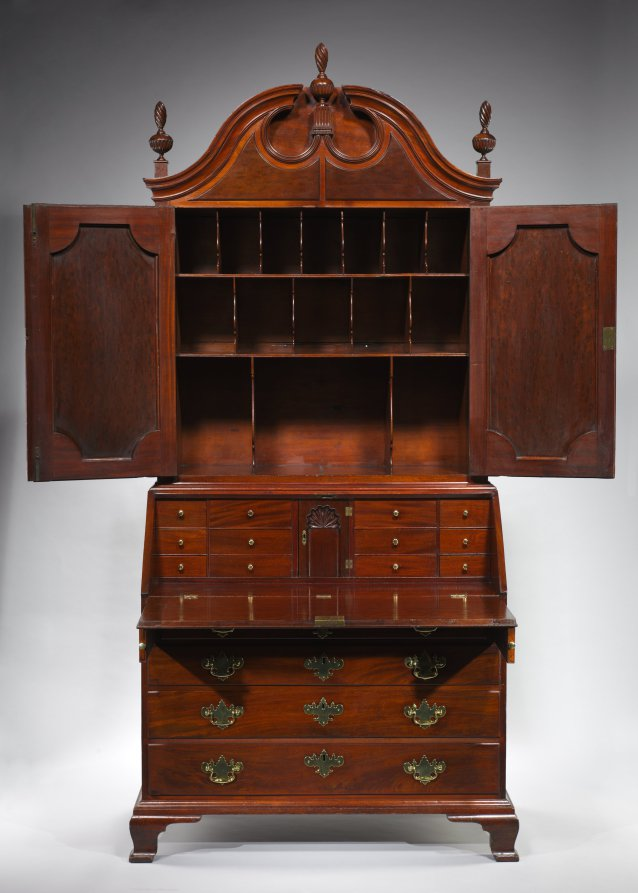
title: Desk and Bookcase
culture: America, Rhode Island, Newport, 18th century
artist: attributed to John Townsend (American, 1732–1809)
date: c. 1780–95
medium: "Plum pudding" mahogany, red cedar, chestnut, white pine, brass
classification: Furniture and woodwork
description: In the 1700s, Newport, Rhode Island, was the fifth largest city in North America and one of the most important centers of shipping and trade along the Eastern Seaboard. Orders for furniture from its celebrated cabinetmakers came in from far and wide. This desk and bookcase was likely made for Oliver Wolcott Sr., a signer of the Declaration of Independence and later governor of the State of Connecticut. Eventually, the desk passed down through his family to Dorothy Draper, an important 20th-century interior decorator, and ultimately to her daughter, Penelope Draper Buchanan, whose husband gave it to the museum after her death—a rare, unbroken line of succession. Large desks were designed to hold all the necessary components of a gentleman’s office under lock and key: books, papers, pens and ink, and important documents. To serve such a function desks also became complicated masterworks of the cabinetmaker’s art, incorporating many parts from small drawers to large panels cut from a single tree, making them among the most expensive types of furniture available. This desk and bookcase exhibits the characteristic traits of classic Newport furniture—“plum pudding” mahogany, cupcake-like finials, and a carved shell on the inside of the desk.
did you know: This desk and bookcase was likely made for Oliver Wolcott Sr., a signer of the Declaration of Independence and later governor of Connecticut.